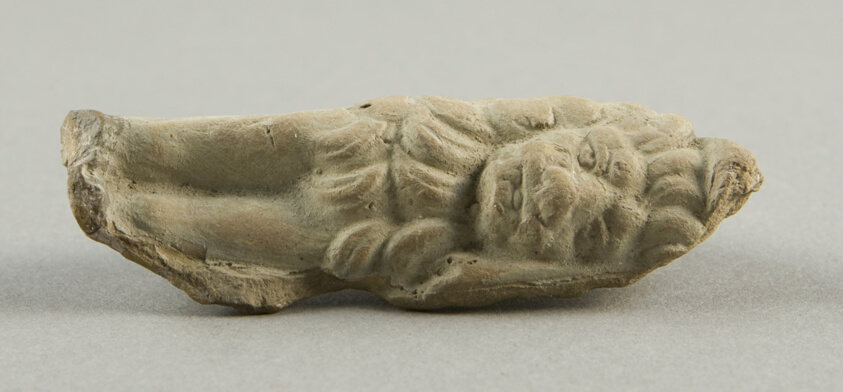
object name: Sculpture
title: Head and Forelegs of Lion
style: greek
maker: Greek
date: 2nd-1st century BCE ?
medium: terracotta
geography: Greece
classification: earthenware; ceramics; sculpture; ancient art